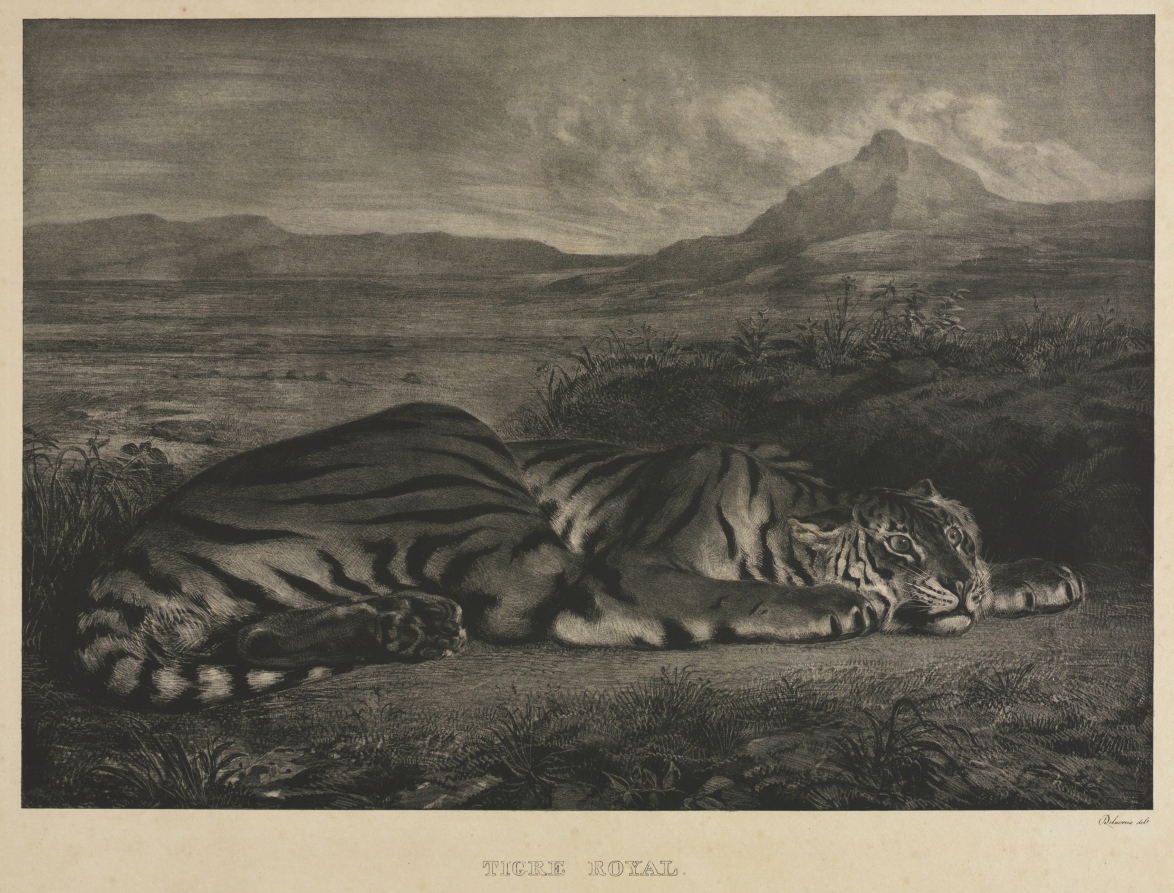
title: Tigre Royal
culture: France, 19th century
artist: Eugène Delacroix (French, 1798–1863)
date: 1829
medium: lithograph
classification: Print